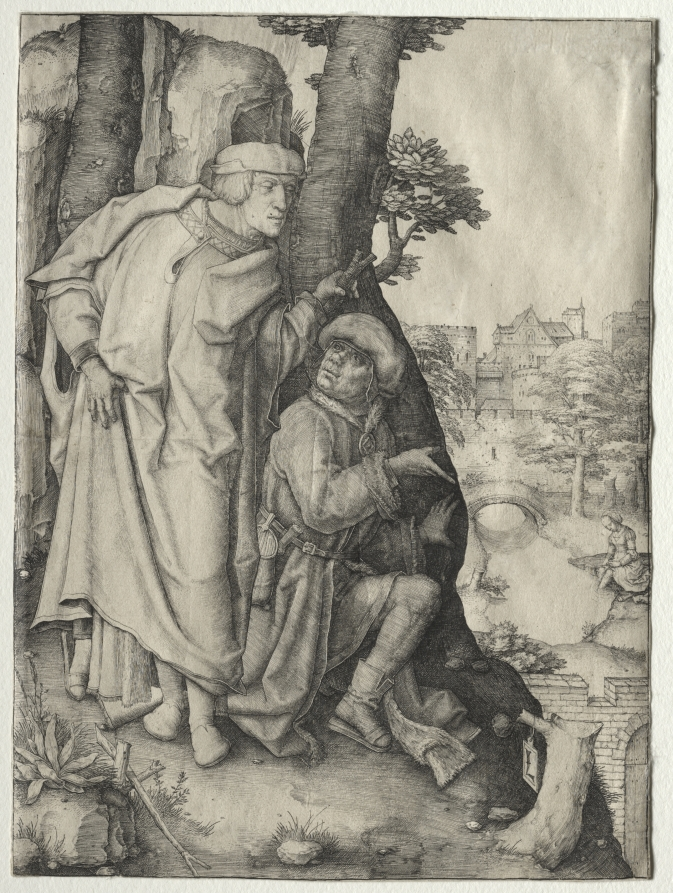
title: Susanna and the Two Elders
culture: Netherlands, 16th century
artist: Lucas van Leyden (Netherlandish, 1494–about 1533)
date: c. 1508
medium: engraving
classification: Print